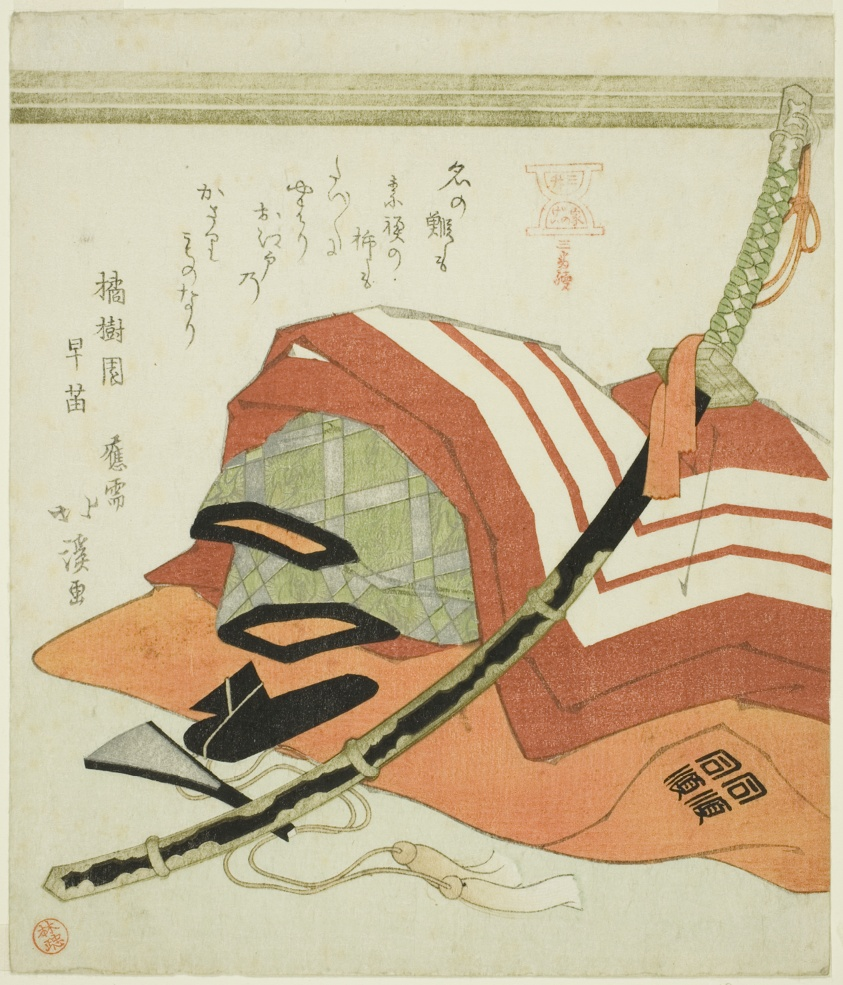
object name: Print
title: Ichikawa Danjuro's costume for Shibaraku, from the series "Acting Skills of the Ichikawa Family, A Set of Three (Mimasuke no gei, sanban tsuzuki)"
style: Japanese (culture or style)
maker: Totoya Hokkei (Japanese, 1780–1850)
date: c. 1818/24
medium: Color woodblock print; shikishiban, surimono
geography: Japan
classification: woodblock print; print; asian art